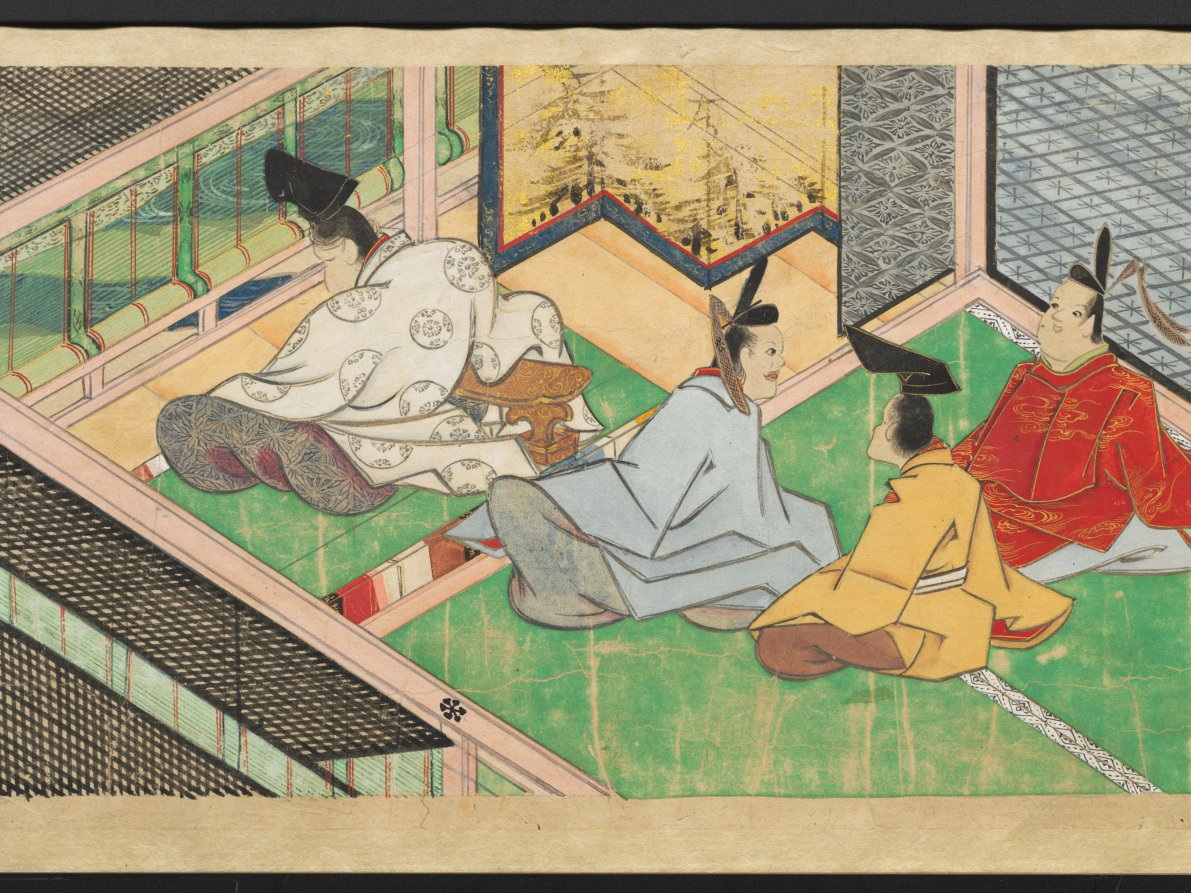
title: The Saltmaker's Story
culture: Japan, Edo period (1615–1868)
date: early 1600s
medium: One of a pair of handscrolls; ink, color, and gold on paper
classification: Painting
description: Once read and copied by girls at New Year’s celebrations and included in dowries, The Saltmaker’s Story is a rags-to-riches tale in which daughters are gifts from the gods. Despite his simple outlook, the main character progresses from humble roots as an associate at Kashima Shrine to the elite status of grandfather of the emperor through the intervention of the Kashima deity. The Saltmaker’s Story is traditionally presented in a set of three scrolls, but the text of this set has been removed by a previous owner, who remounted the illustrations as a pair. The paintings of this one take us from right to left through the first half of the tale.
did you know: This handscroll originally had texts before its paintings, but the texts were removed.